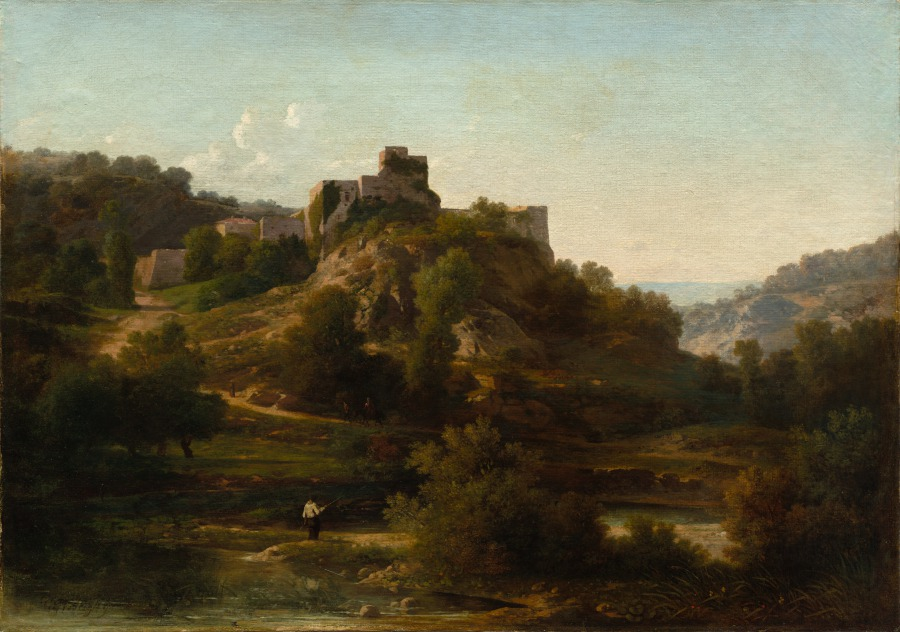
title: Châteauvieux-sur-Suran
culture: France, 19th century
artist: Antoine-Claude Ponthus-Cinier (French, 1812–1885)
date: 1848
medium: oil on paper mounted on fabric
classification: Painting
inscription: Signed lower left: [?] Aligny [false] / [mostly covered signature a little further to the right:] Ponthvs cinier Distinguishing marks on reverse: handwritten on stretcher: C'Aligny Vue d'Italie; handwritten label: Aligny / Paysage dans le Midi de la France / 1; French customs stamp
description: This view of a ruined building on a rocky cliff in Châteauvieux above the Suran river in the French Alps is constructed in the manner of a classical or ideal landscape. Forms recede at a measured pace along a sinuous, curving path that passes through carefully defined planes of fore, middle, and background. The warm, glowing light and imaginary figures pursuing their daily tasks contribute to the mood of timeless, pastoral bliss.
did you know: The son of a merchant, Ponthus-Cinier was one of the principle artists of the School of Lyon and painted neoclassical views of the countryside around Lyon and the Alpine region near the Swiss border.